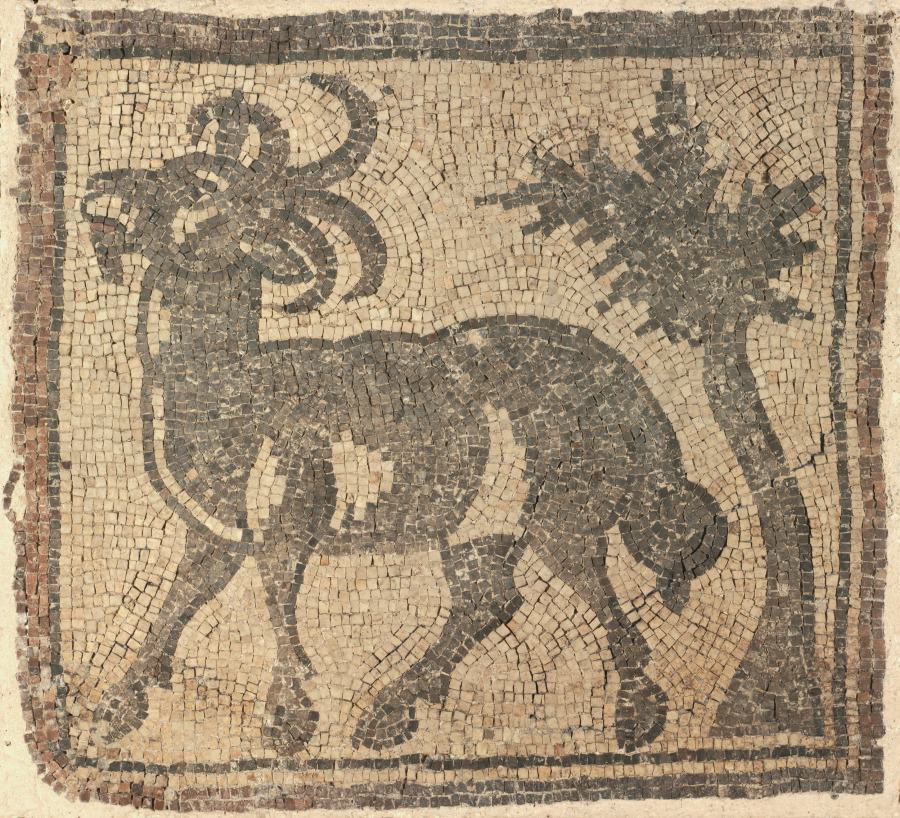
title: Ram near a Tree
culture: Byzantium, Northern Syria, Byzantine period, 5th century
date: 400s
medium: marble tesserae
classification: Mosaic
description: The two mosaic fragments of an ibex and a ram (1969.114) once formed part of a much larger floor mosaic that decorated an early Byzantine church in northern Syria. Displayed upright in the museum context, these mosaic fragments were originally displayed flat, possibly flanking the church's altar to evoke a paradise setting. The mosaic fragment showing the Fall of Adam and Eve (1969.115) is likely to have formed part of the same floor.